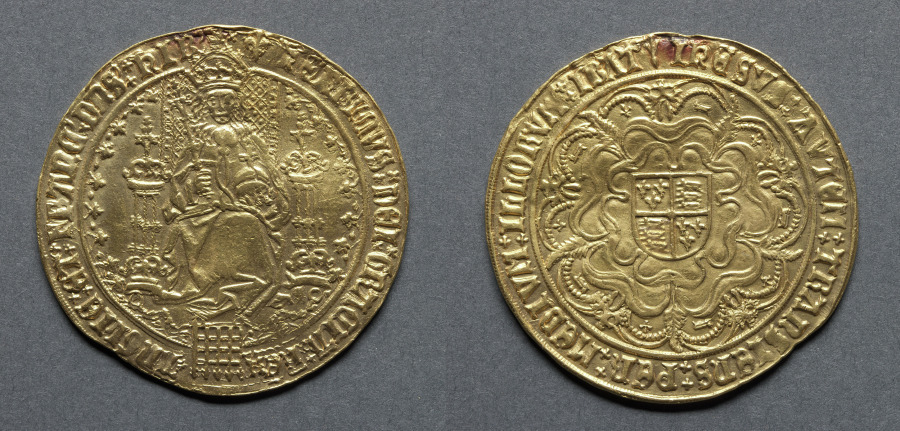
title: Sovereign: Henry VIII Enthroned (obverse); Royal Arms on Tudor Rose (reverse)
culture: England, Henry VIII, 1509-1547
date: 1526–44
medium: gold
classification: Coins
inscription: henricvs dei gracia rex anglie et franc dns hib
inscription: ihesvs avtem transiens per medivm illorvm ibat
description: During his life Henry VII had accumulated enormous wealth, and it took his son, Henry VIII, until 1542 to squander it. Henry knew how the English coinage had been debased in the past and did not see why it should not be debased again, this time for his personal benefit. Regardless of the inevitable financial catastrophe, he grasped at this easy revenue and in his last years not only debased the gold coinage to 20 ct., but the silver also, to one part silver and two parts alloy.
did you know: The Sovereign was first produced by Henry VII in 1489; he wanted a new gold coin to represent the power of his reign.